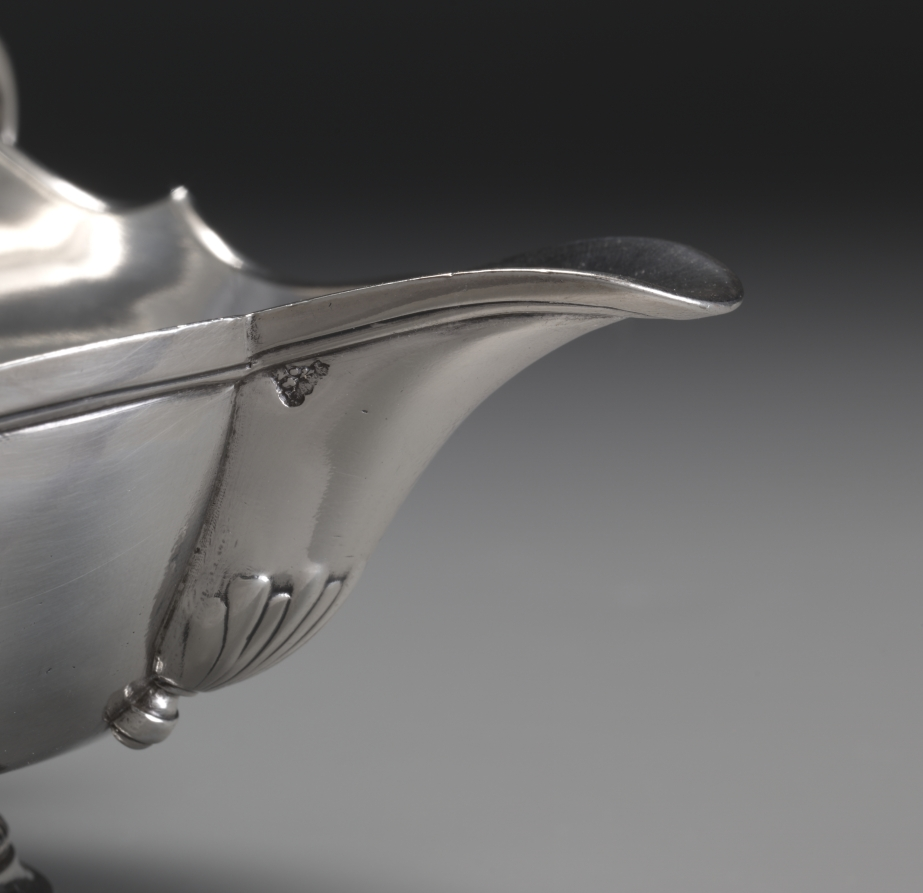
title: Sauce Boat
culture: France, Paris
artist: Nicolas Duclos (1699–1755), master silversmith in 1726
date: 1743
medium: silver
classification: Silver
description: When heated sauces began to be served separately from meat and fish towards the end of the 17th century, sauce boats began to be used as another piece of elaborately designed silver dinner services popular in European courts. This sauce boat reflects early models in the shape of a nef, a condiment vessel which derives its name from a ship of the same shape.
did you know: This sauceboat would likely have been accompanied by a tray and a spoon used to skim grease from the surface of the sauce.